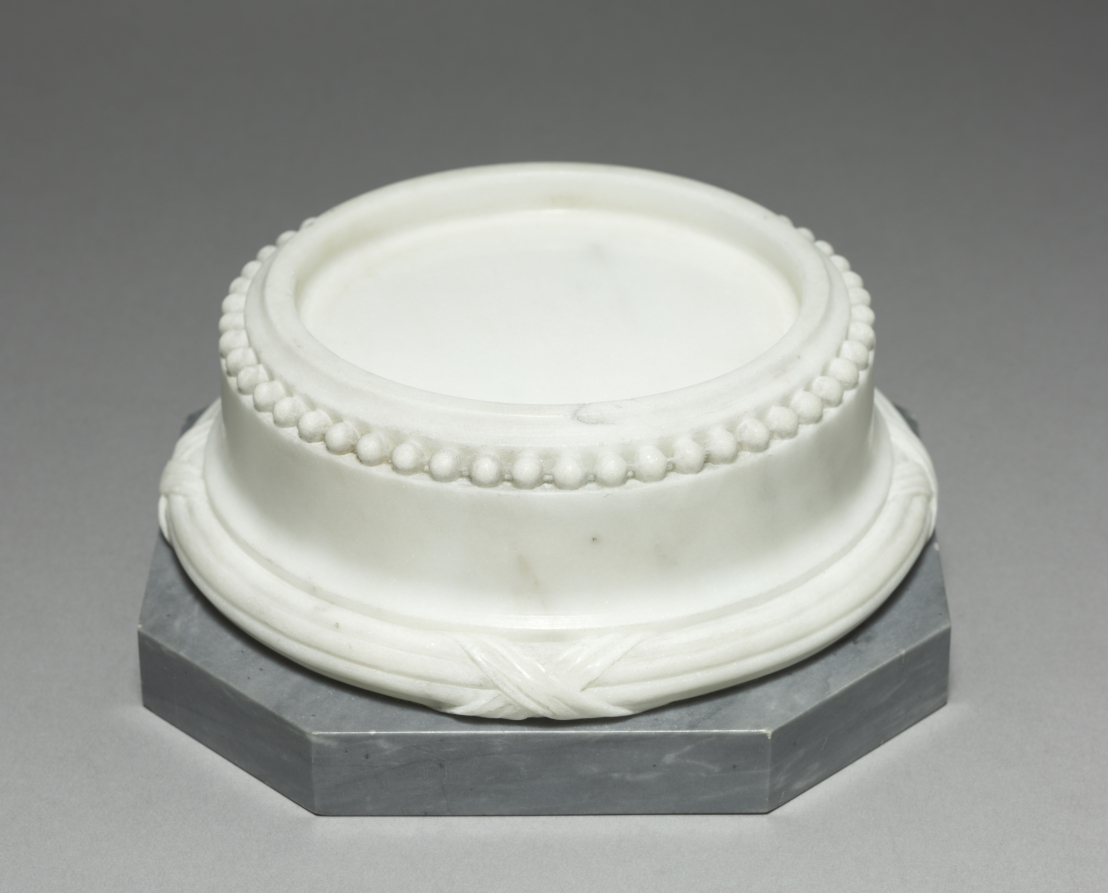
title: Faithful Love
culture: France, 19th century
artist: after Augustin Pajou (French, 1730–1809)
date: 1800s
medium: marble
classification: Sculpture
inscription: signature behind stump with roses: Pajou f(ecit) 1787.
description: These statuettes represent the opposing spectrums of love—fickle and faithful—both portrayed by Cupid. Fickle Love absent-mindedly plays with a butterfly, a symbol of the fleeting moment. Conversely, Faithful Love is accompanied by a dog, the ultimate loyal companion. These works were originally believed to be by the hand of Augustin Pajou, because the works are signed and he made nearly identical sculptures. However, due to the slightly clumsy execution and the awkward scale of the signatures, the museum now believes the statuettes were created by another artist after Pajou's design.